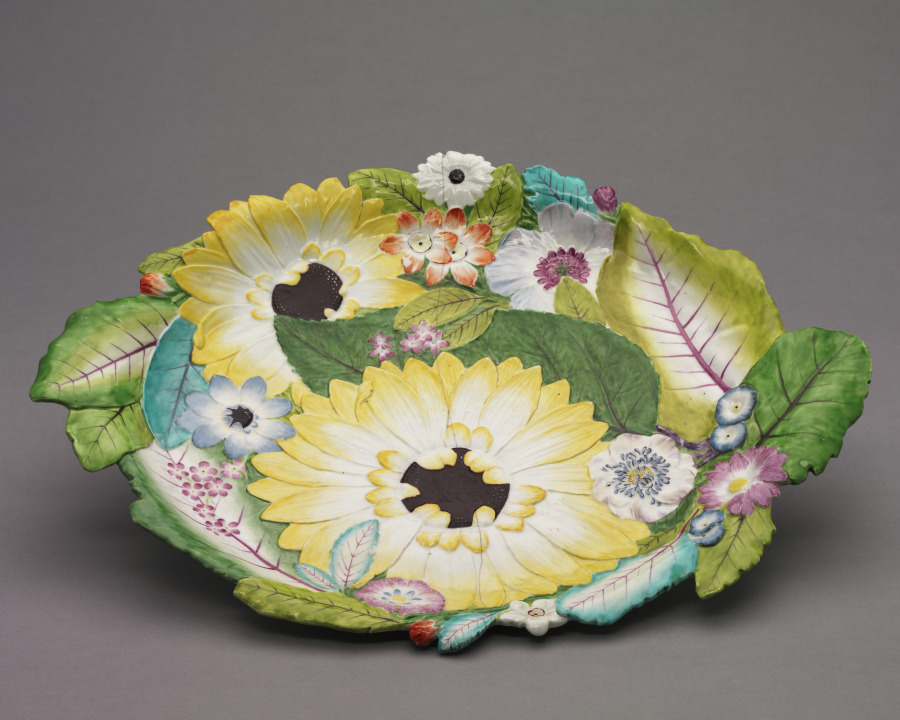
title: Stand for a Hen and Chicks Tureen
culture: England, London, Chelsea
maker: Chelsea Porcelain Factory (Britain, London, 1745–84)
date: c. 1755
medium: soft-paste porcelain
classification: Ceramic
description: The ceramic factory at Chelsea, located along the river Thames in western London, was Britain’s most renowned factory of decorative porcelain in the mid-1700s. Large tureens in the form of chickens or rabbits appealed to wealthy aristocrats, who took great care in developing specimen animal and poultry breeds on their country estates. The design for this particular tureen was taken from a popular seventeenth-century print by Francis Barlow depicting a farmyard.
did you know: See cover record for Hen and Chicks Covered Tureen (1984.58).